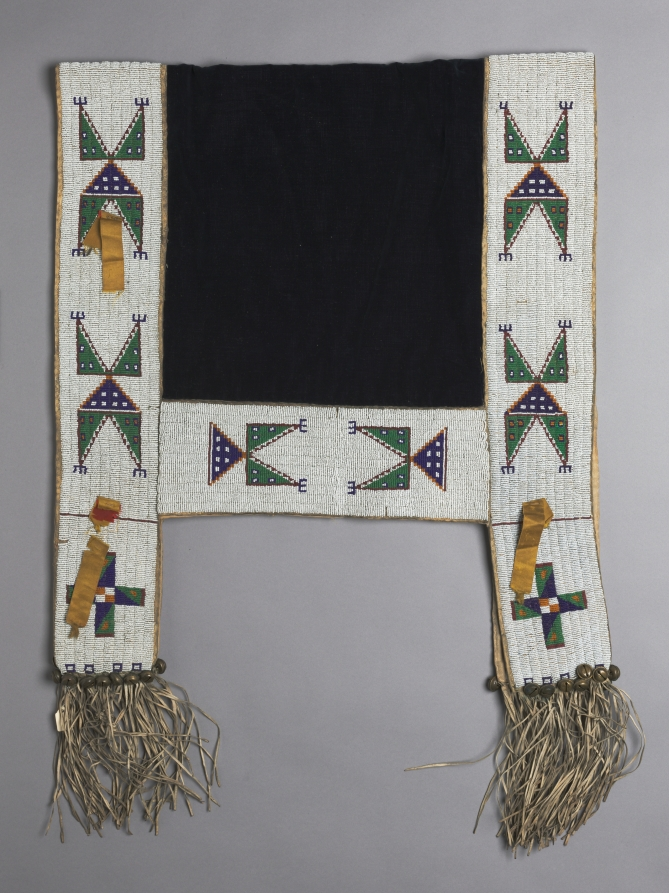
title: Saddle Blanket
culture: America, Native North American, Plains, Dakota, Lakota(Sioux), 19th century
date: third quarter of 19th century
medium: velvet, leather, beads, silk, metal, sinew sewn, paha stitch; white cotton lining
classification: Textile